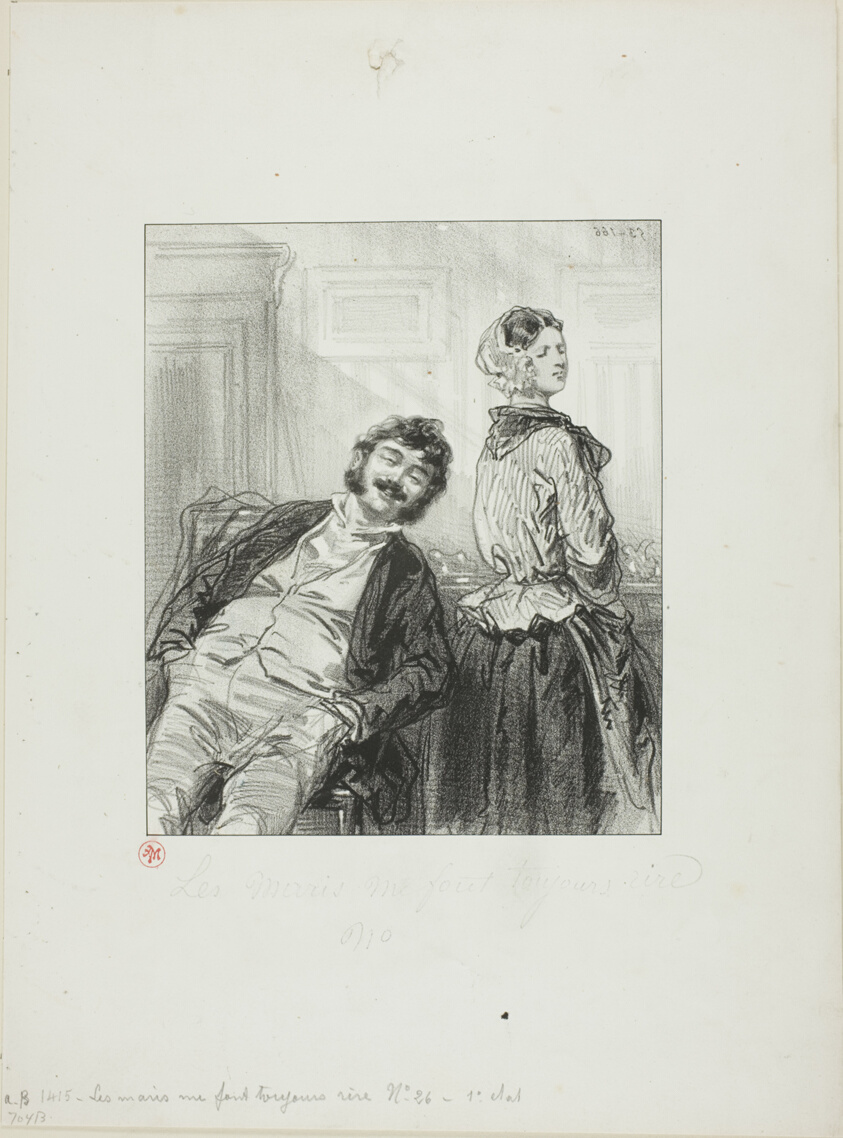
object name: Print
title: Husbands Always Make Me Laugh: Come, Mme. Rabat-joie, shut up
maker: Paul Gavarni (French, 1804-1866)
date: 1853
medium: Lithograph in black on cream wove paper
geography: France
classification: lithograph; print; prints and drawing